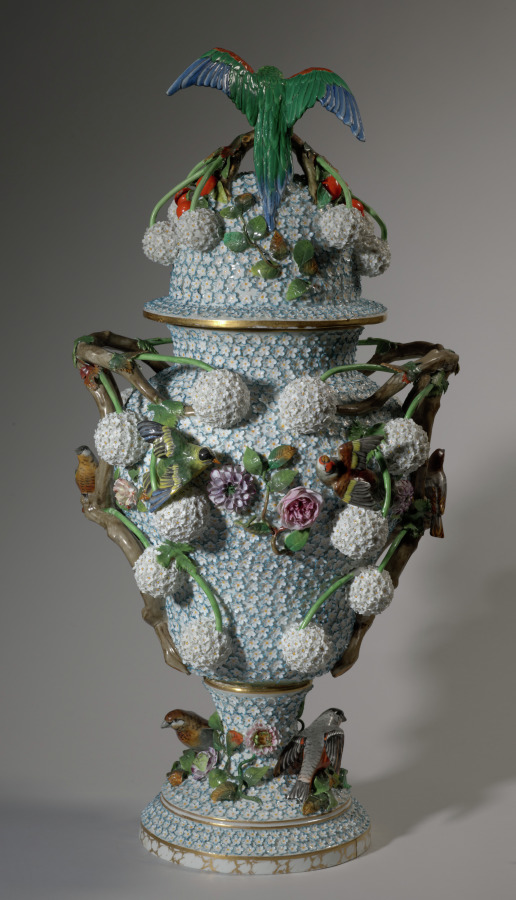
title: Vase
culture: Germany, 19th century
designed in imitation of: Meissen Porcelain Factory (German, est. c. 1710)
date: 1850–1899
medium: porcelain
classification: Ceramic